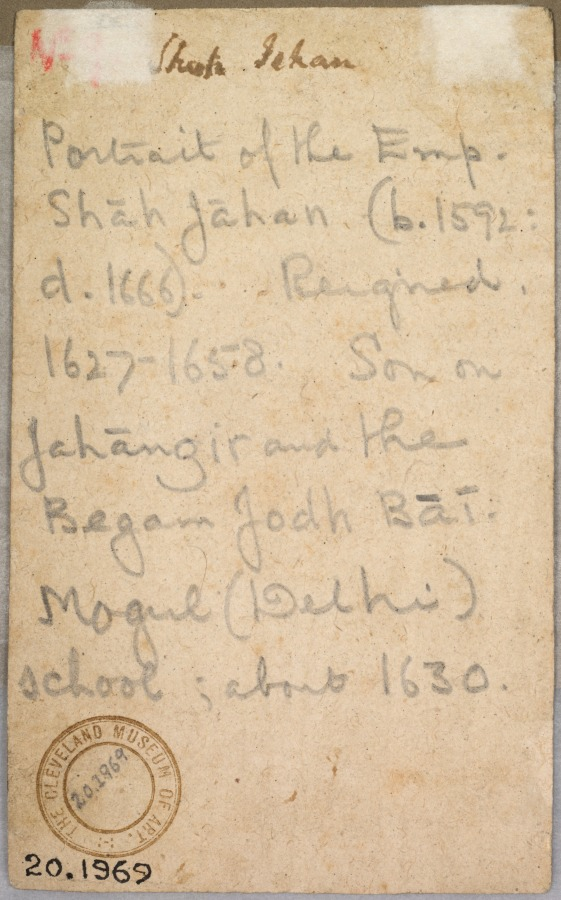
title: Shah Jahan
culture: India, Mughal Period (1526-1756)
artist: Hashim (Indian, active 1598-c.1650)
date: c. 1630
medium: Gum tempera, ink, and gold on paper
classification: Painting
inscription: signed: amal-i Muhammad Hashin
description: This sensitive portrait jewel was probably painted shortly after Shah Jahan came to the throne of the powerful Mughal Empire in 1628 after the death of his father, Jahangir. He decided to wear a full beard, in reference to his increased orthodoxy in comparison to his more liberal father and grandfather. The artist’s signature appears behind Shah Jahan’s nape.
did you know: This portrait belonged to Cleveland mogul Jeptha H. Wade II, a cofounder of CMA.